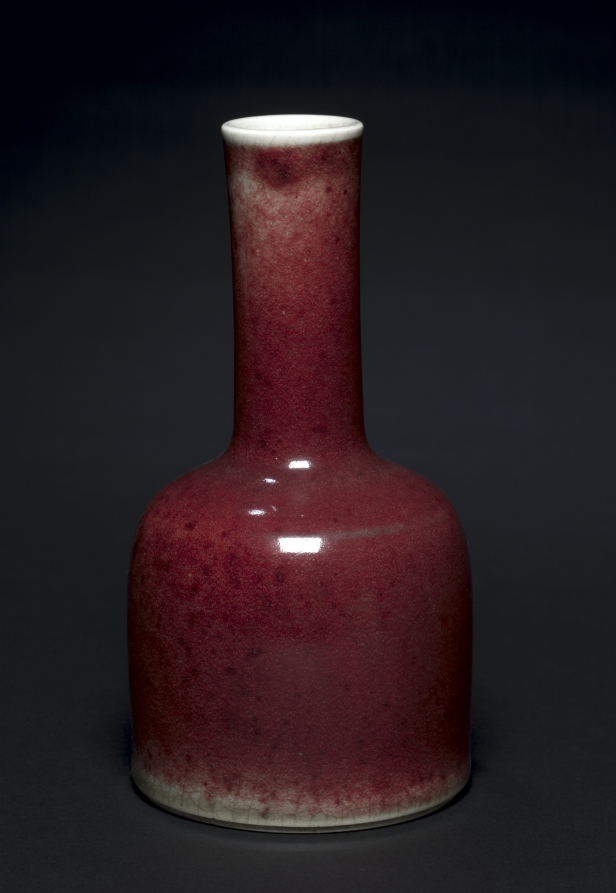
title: Bell-shaped Bottle: Lang Ware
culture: China, Qing dynasty (1644-1911), Kangxi reign (1661-1722)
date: 1662–1722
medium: porcelain with red copper glaze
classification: Ceramic